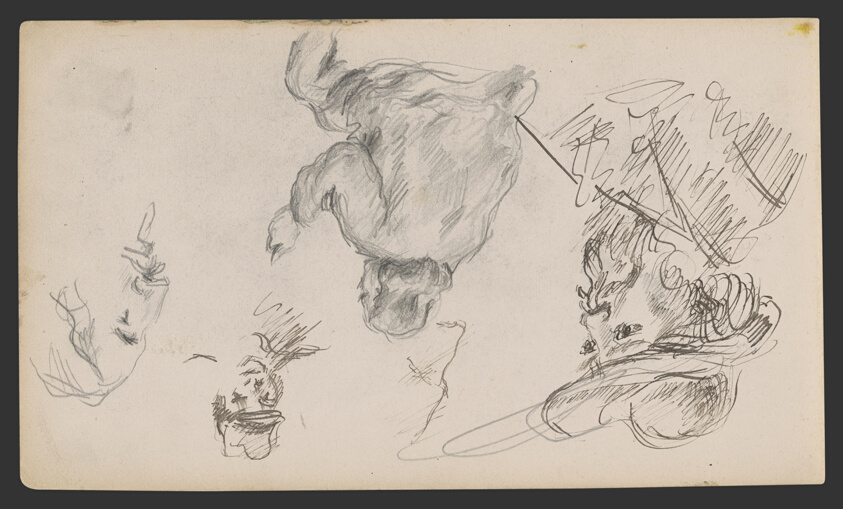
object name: Drawing and Watercolor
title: Sketchbook No. 2 (L'Estaque)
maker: Paul Cézanne; French, 1839-1906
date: 1875–86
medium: Graphite and pen and ink drawings on paper, bound into a book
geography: France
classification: sketchbook; graphite; prints and drawing; paper